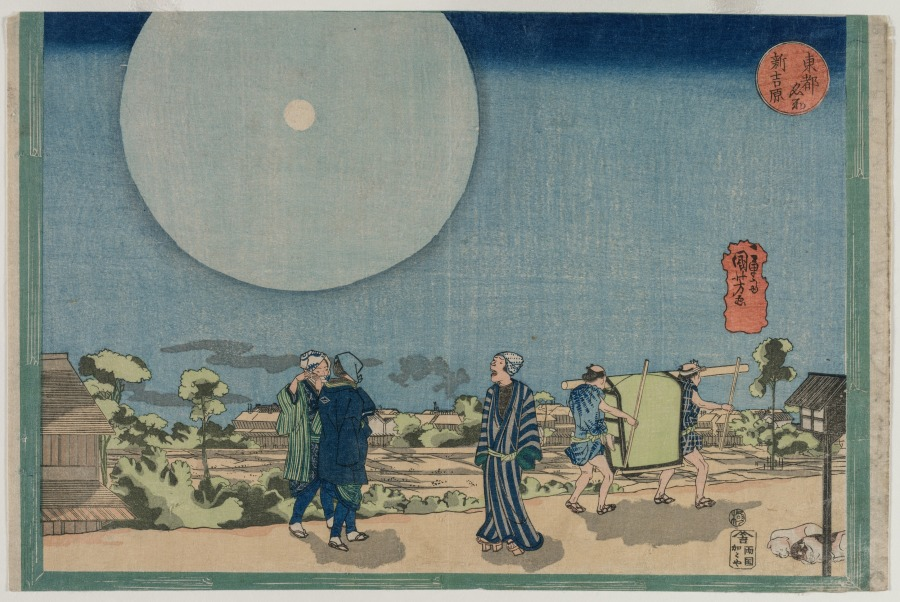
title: New Yoshiwara (Shin Yoshiwara), from the series Famous Places in the Eastern Capital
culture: Japan, Edo period (1615–1868)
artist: Utagawa Kuniyoshi (Japanese, 1797–1861)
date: early 1830s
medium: color woodblock print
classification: Print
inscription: Signature: Ichiyusai Kuniyoshi ga Publisher: Kagaya Kichibei (Kagaya, Ryogoku, emblem) Censorship Seal: kiwame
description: In this dramatic night scene, Kuniyoshi emphasized the moon and its huge glowing halo. He employed Western-style shadows beneath the figures and the palanquin. The man at the center is singing with his mouth wide open. Perhaps he is headed home after drinking in New Yoshiwara, the pleasure quarter, visible only as a series of low rooflines in the background beyond the rice paddies. The chatting pair and wealthy passenger inside the palanquin may be on their way to the pleasure quarter.